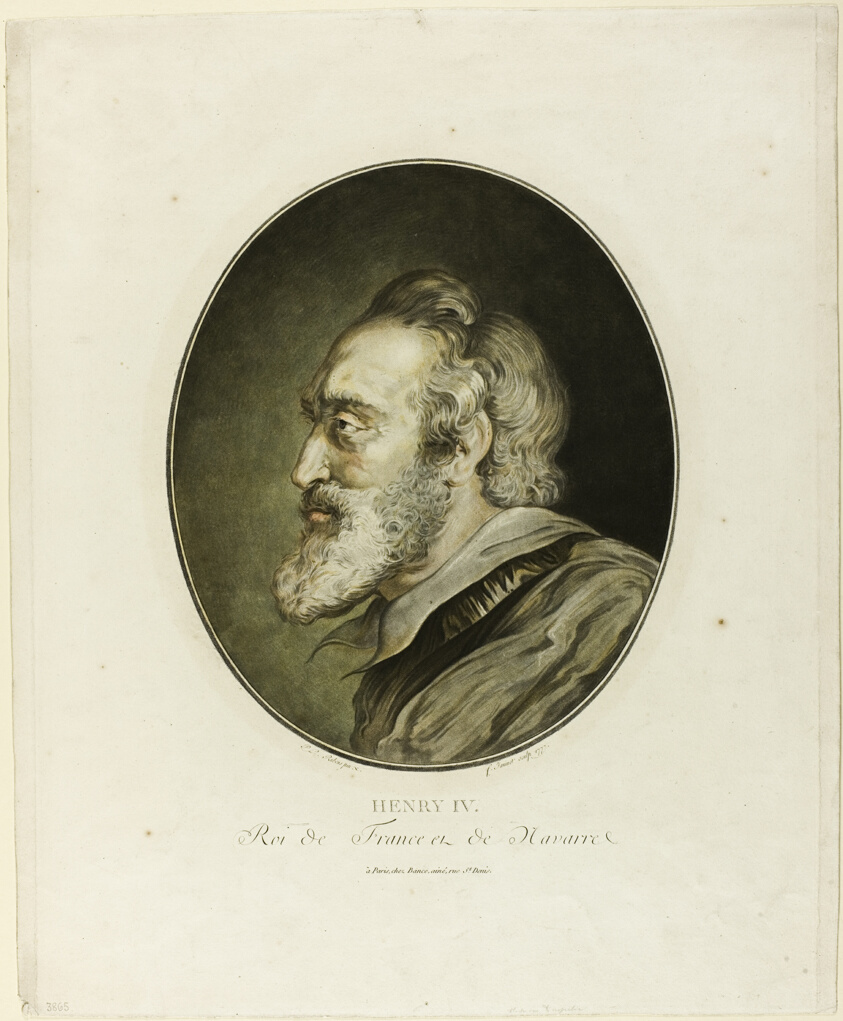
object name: Print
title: Henry IV, King of France and Navarre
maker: Jean-François Janinet; French, 1752-1814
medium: Color aquatint on paper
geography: France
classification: aquatint; print; prints and drawing